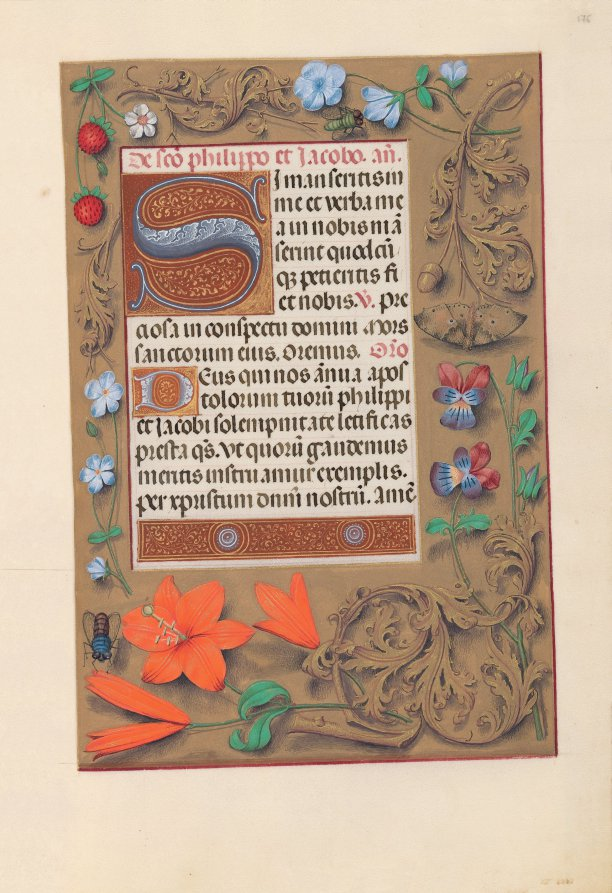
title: Hours of Queen Isabella the Catholic, Queen of Spain: Fol. 176r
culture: Flanders, Ghent and Bruges, late 15th century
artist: Master of the First Prayerbook of Maximillian (Flemish, c. 1444–1519)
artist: and Associates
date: c. 1500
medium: ink, tempera, and gold on vellum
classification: Bound Volume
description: This manuscript was illuminated by a circle of at least five highly organized manuscript painters active in the Flemish cities of Ghent and Bruges. The principal illuminator was Alexander Bening, who painted the majority of the book's miniatures. Manuscripts produced by this circle of artists are renowned for the decoration of their borders, which typically feature a rich variety of realistically-painted flowers, birds, and butterflies. This prayer book, called a book of hours, was intended not for a cleric, but for the private devotions of a lay person-in this case, Isabella the Catholic, Queen of Spain (1451-1504). Isabella's coat of arms embellishes the book's frontispiece. It is unlikely that the book was commissioned by the Queen herself; rather, she probably received it as a diplomatic gift from someone courting her patronage, perhaps Cardinal Francisco Jimenez de Cisneros. A Franciscan friar, Jimenez was dependent upon Isabella for his advancement, first to the post of Queen's confessor in 1492, and then to Archbishop of Toledo in 1495.